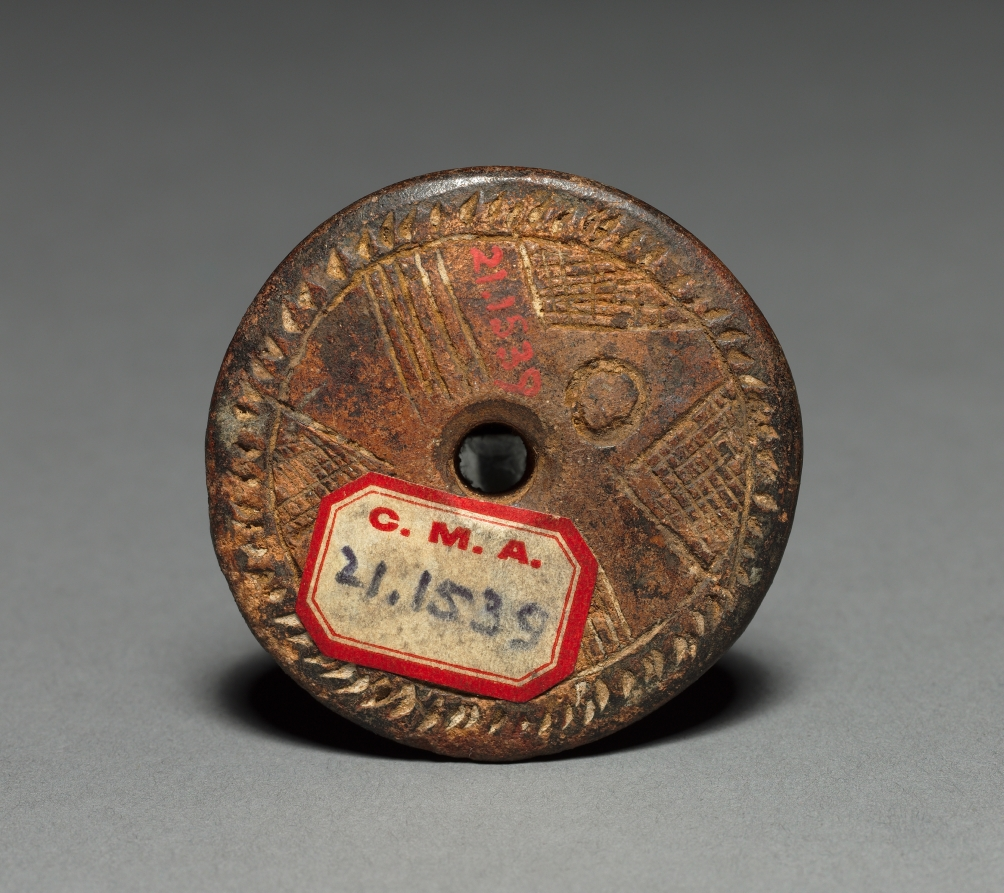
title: Spinning Whorl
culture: Colombia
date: before 1921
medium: red ware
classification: Ceramic